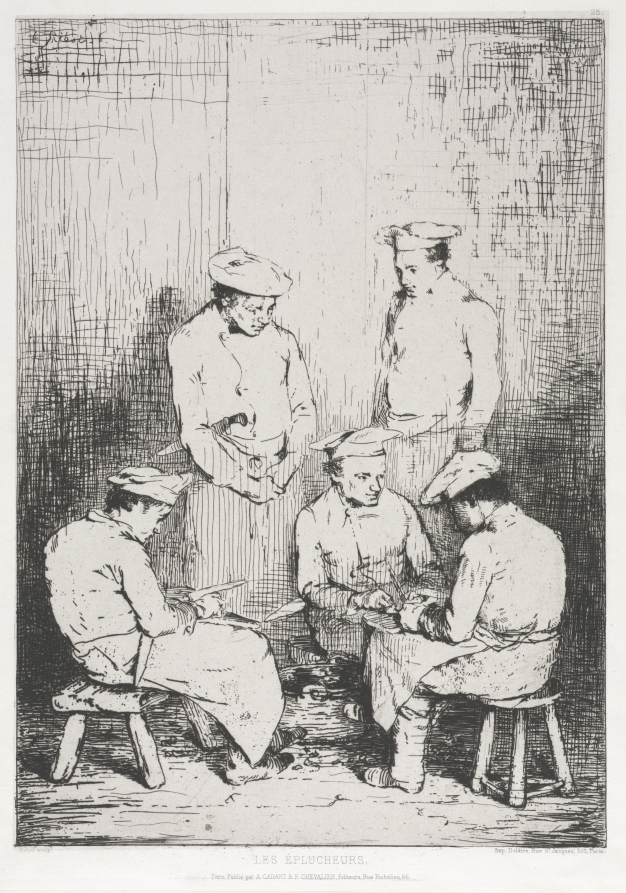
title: The Potato Peelers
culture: France, 19th century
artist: Théodule Ribot (French, 1823–1891)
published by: A. Cadart & F. Chevalier, rue Richelieu, 66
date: 1863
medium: etching on chine collé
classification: Print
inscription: signed in plate, upper left: "T. Ribot"